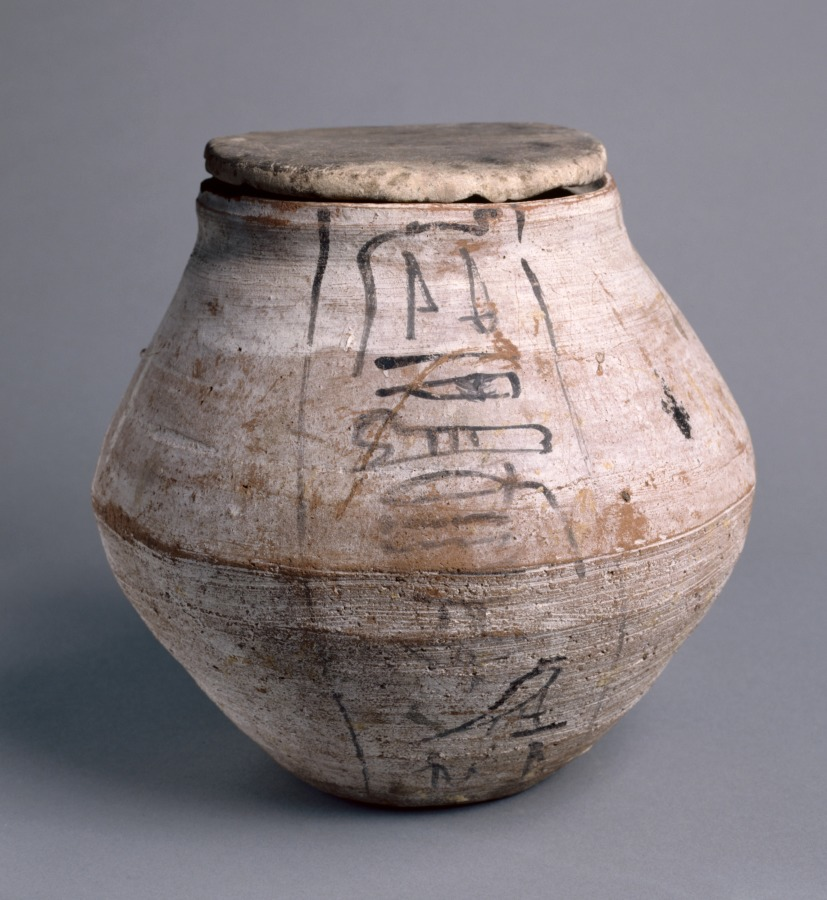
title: Shawabty Jar with Lid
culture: Egypt, New Kingdom (1540–1069 BCE), Dynasties 19–20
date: 1295–1069 BCE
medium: Nile silt ware; lid of limestone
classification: Funerary Equipment